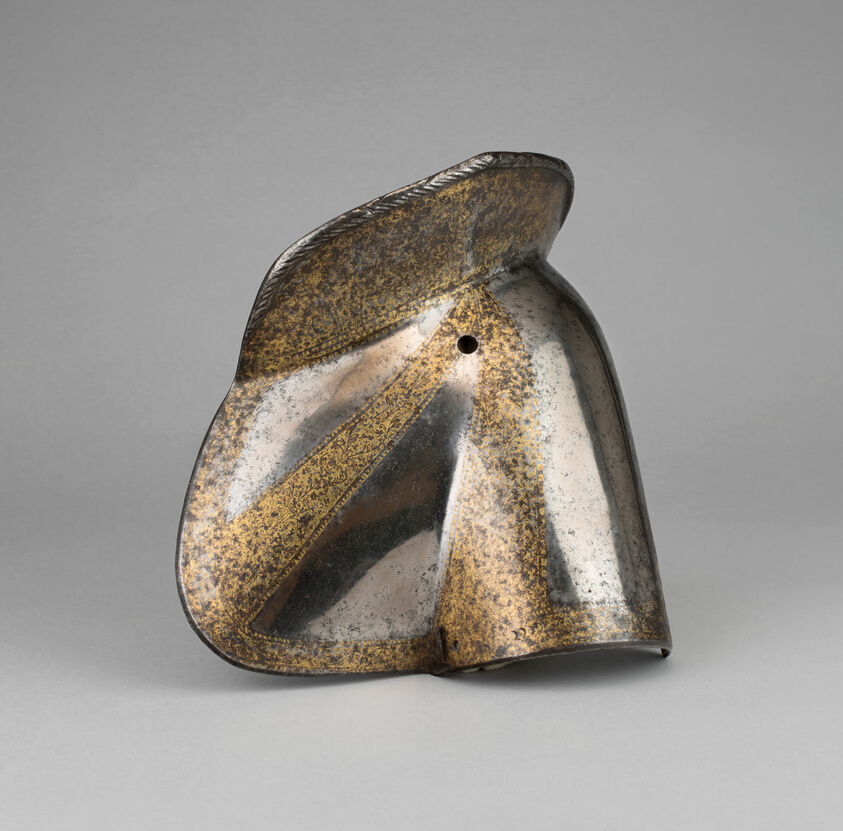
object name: Armor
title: Elements of an Armor Garniture for the Field, Joust, and Tourney of a Radziwill Prince of Poland and Lithuania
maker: South German; Augsburg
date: 1573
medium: Steel, gilding, and leather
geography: Augsburg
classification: suit; armor; arms and armor